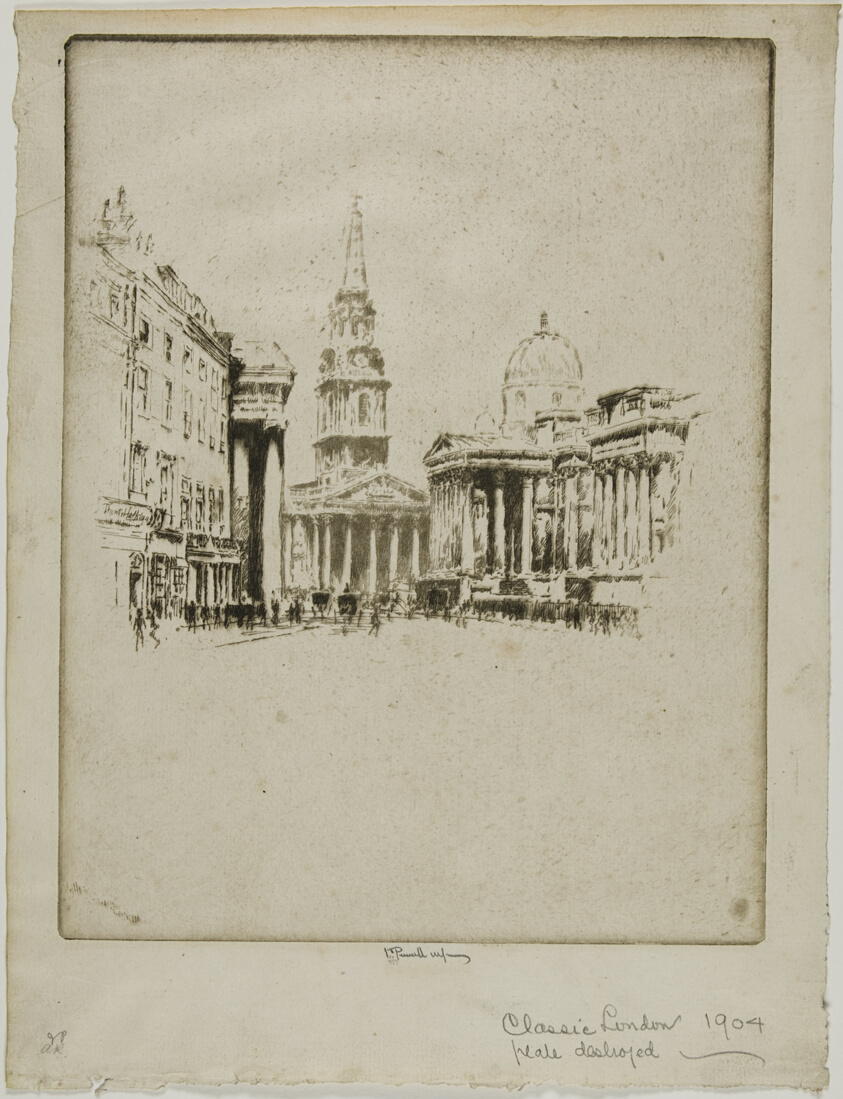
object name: Print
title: Classic London, St. Martin's-in-the-Fields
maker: Joseph Pennell (American, 1857-1926)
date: 1906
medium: Etching on ivory laid paper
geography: United States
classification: etching; print; prints and drawing